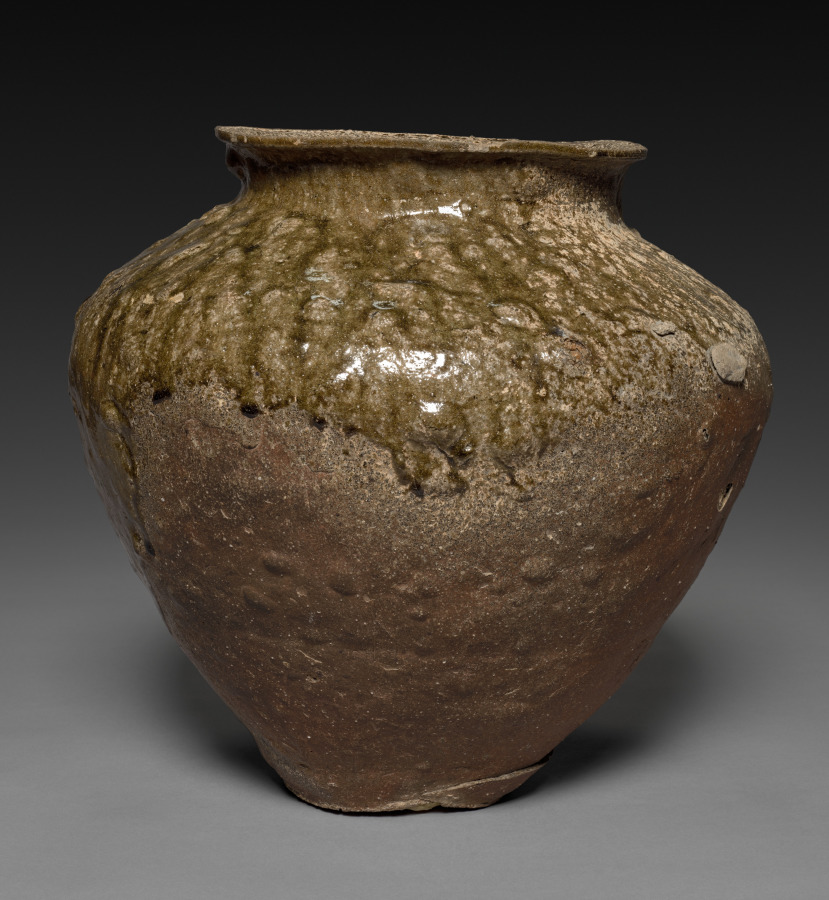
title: Storage Jar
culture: Japan, Kamakura period (1185–1333)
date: late 1100s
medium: Stoneware with natural ash glaze (Tokoname ware)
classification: Ceramic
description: Tokoname, located on Ise Bay in present-day Aichi prefecture on Japan’s main island, Honshu, was the largest center of ceramic production in medieval Japan. It had been an active center of ceramic production since the Heian period (794–1185). Wide-mouthed jars like this one are called kame, and were favored for use in tea practice.